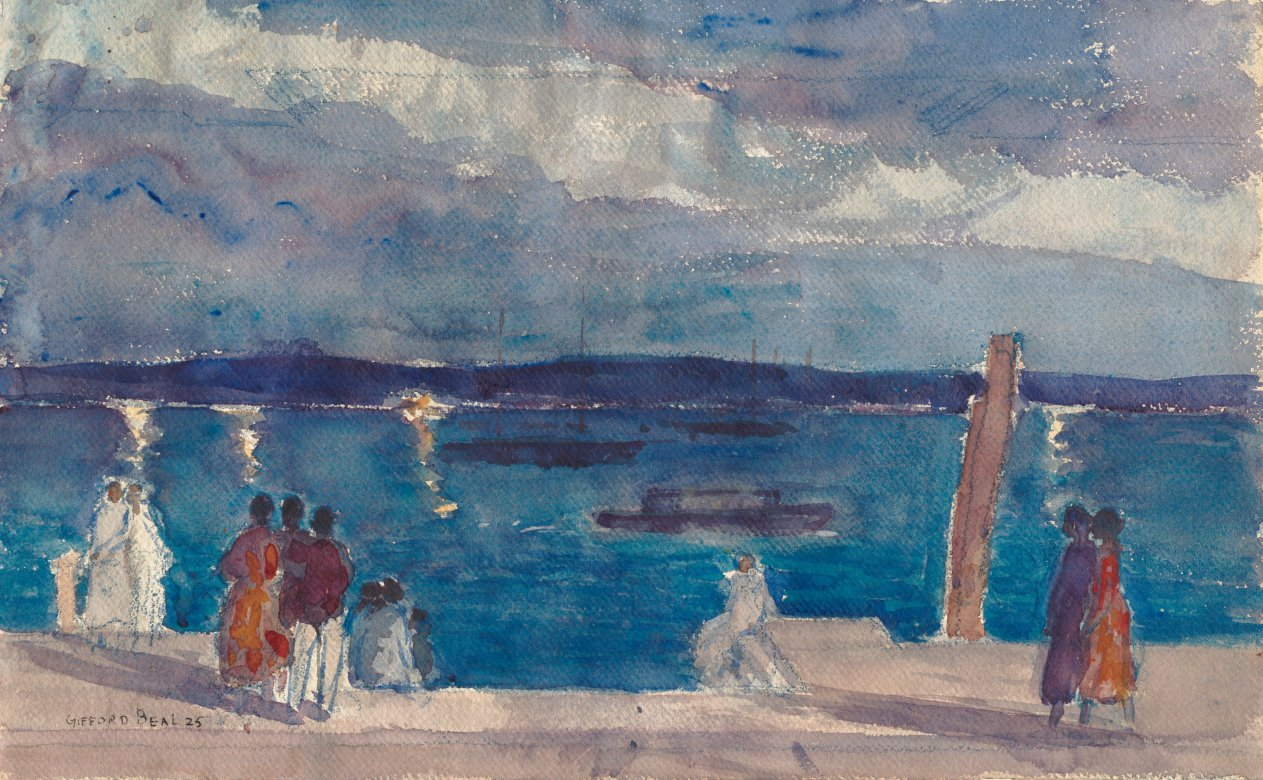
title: Twilight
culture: America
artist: Gifford Beal (American, 1879–1956)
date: 1925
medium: watercolor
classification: Drawing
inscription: Signed Gifford Beal 25 in lower left, recto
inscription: Exhibition label upper left, verso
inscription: In graphite, upper left, verso: "Moonlight Night Nassau"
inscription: In graphite, center, verso: "Sold to Mr. King"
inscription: Blue graphite sketch on verso